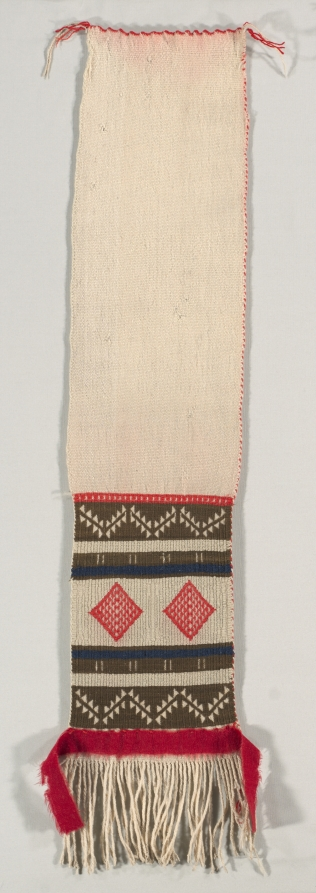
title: "Hopi Brocade" Style Dance Sash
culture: America, Native North American, Southwest, Pueblo (Hopi), Post-Contact, Late Classic Period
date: c. 1874–1885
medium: plain weave with supplementary weft wrap; wool (handspun, Germantown, and bayeta)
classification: Textile